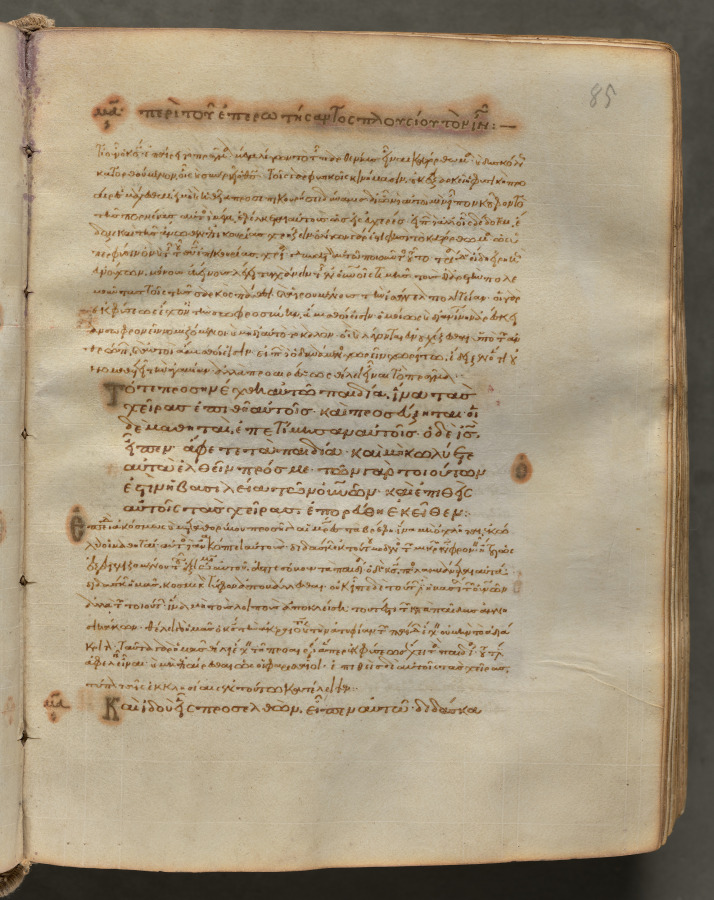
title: Text, folio 85 (recto), from a Gospel Book with Commentaries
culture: Byzantium, Constantinople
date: c. 1000–1100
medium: ink, tempera, and gold on vellum; leather binding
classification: Bound Volume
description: Each of the four gospels in this book opens on a page with brilliantly illuminated borders depicting the author of the text as well as birds-principally peacocks, symbols of the immortality of the soul-and fountains, representing the fountain of life and the salvation of the soul. This volume consists of 428 leaves with texts in Greek. Its level of sophistication suggests that it was probably written and decorated in a monastery in Constantinople.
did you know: Gospel Books were carried in procession through Byzantine churches.